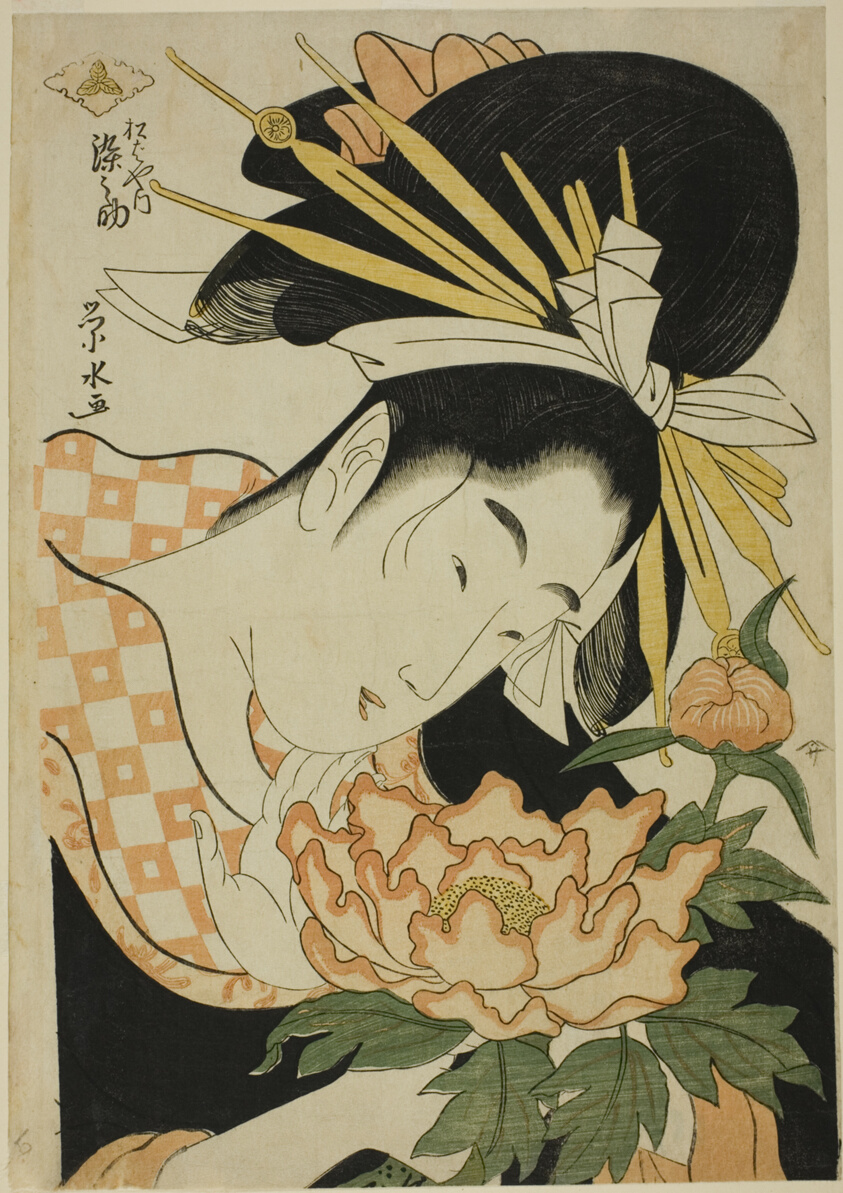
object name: Print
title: The Courtesan Somenosuke of the Matsubaya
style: Japanese (culture or style)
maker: Ichirakutei Eisui (Japanese, active 1790-1823)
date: c. 1797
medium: Color woodblock print; oban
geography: Japan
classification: woodblock print; print; asian art